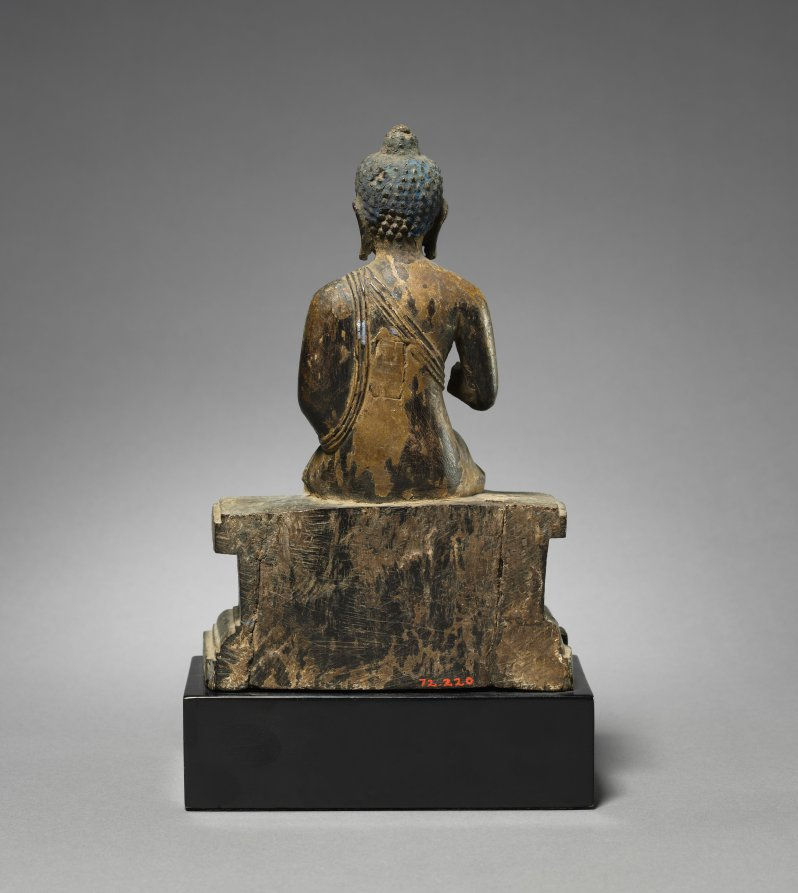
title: Figure of a Maitreya on a Tiered Pedestal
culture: Nepal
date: c. 1200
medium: gilded wood with polychrome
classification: Sculpture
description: The pendant legs of this image indicate that he is the next historical figure to achieve enlightenment and spread Buddhist teachings in a future time when the current historical Buddha's teachings will have been forgotten. Nepalese artists were famous for their skill in woodcarving. Since wood is scarce in Tibet, Nepalese woodworkers were invited to import materials and work in wealthy Tibetan monasteries and palaces and were important transmitters of styles and iconographies.